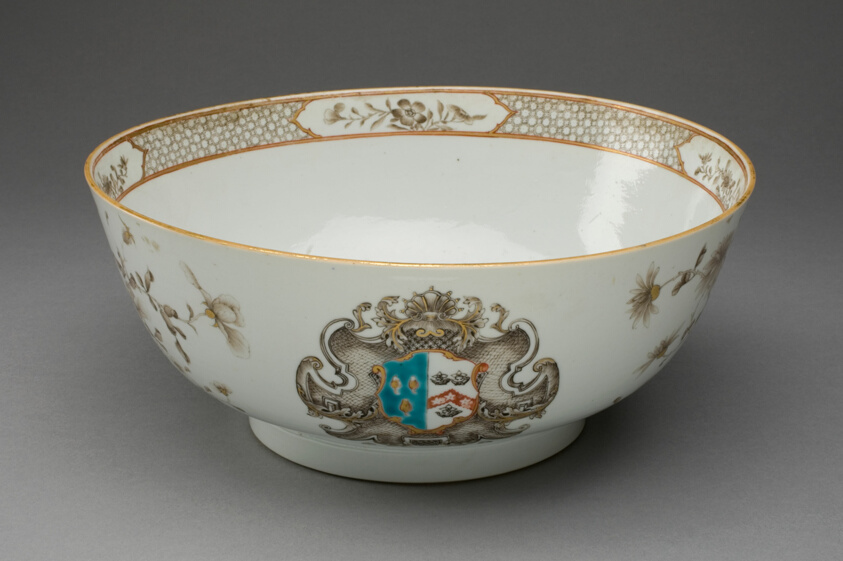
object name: Ceramics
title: Punch Bowl with the arms of Smith impaling Horne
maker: China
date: c. 1740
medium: Hard-paste porcelain with polychrome enamels and gilding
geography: Jingdezhen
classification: punch bowl; bowl; ceramics